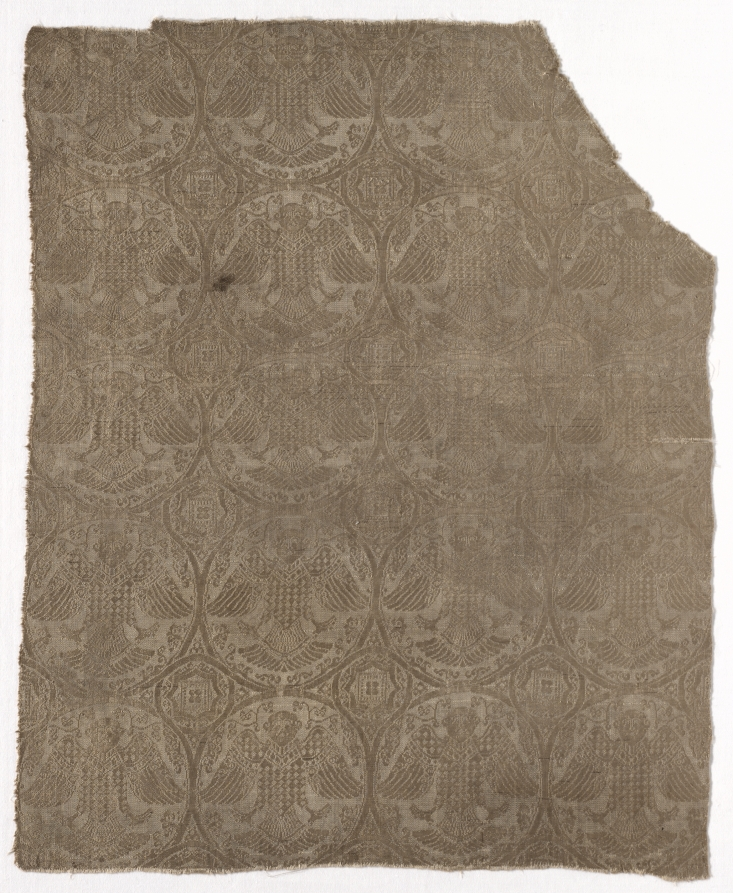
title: Fragment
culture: Iran, in the style of the Buyid period (945–1055)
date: before 1968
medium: Silk: lampas weave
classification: Textile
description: This textile preserves five rows of aligned, tangent roundels with four in each row. Each roundel contains a front-facing harpy with a checkered body and stylized plant forms surrounding it. Interspaces are filled with small roundels tangential to the design. Each small roundel encloses an eight-pointed star within which is a square ornamented with four centered pearls. Interstices are filled with stylized plant forms.